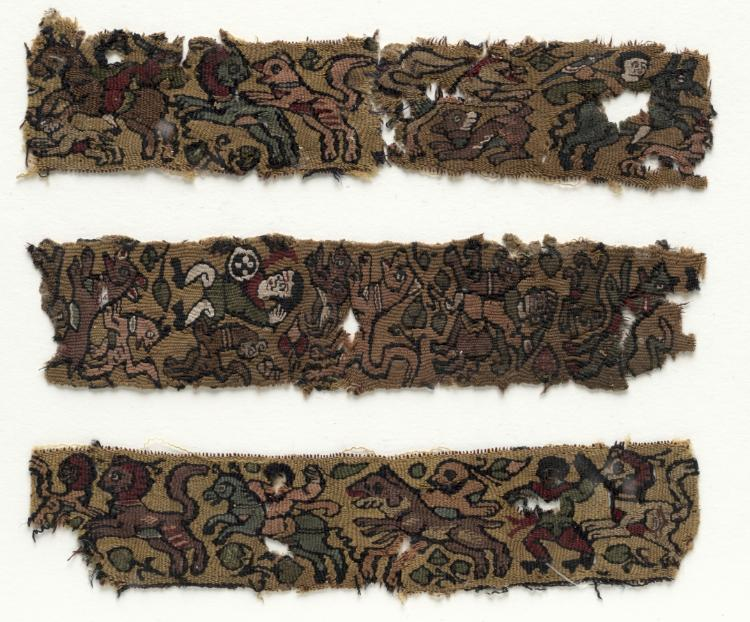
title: Three Fragments from a Border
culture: Egypt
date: before 1968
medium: tapestry weave; wool and linen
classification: Textile